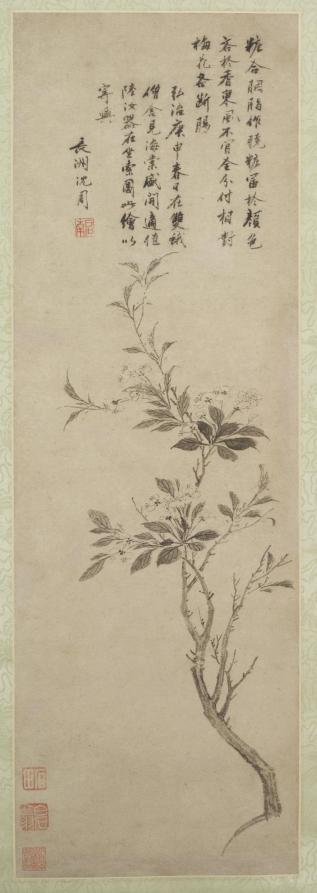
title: Flowering Crab Apple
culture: China, Ming dynasty (1368–1644)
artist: Shen Zhou (Chinese, 1427–1509)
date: 1500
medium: hanging scroll, ink on paper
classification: Painting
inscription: 粧[粉]合胭脂作曉粧，富於顔色吝於香。 東風不肯全分付，相對梅花各斷腸。 弘治庚申春日, 在雙蛾僧舍見海棠盛開, 適值陸汝器在坐索圖, 此繪以寄興。 長洲沈周 [印]啟南; 石田; 白石翁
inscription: 1 additional seal of Wu Yun 吳雲 (1811-1883).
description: Shen Zhou painted a broken branch (zhezhi 折枝) of crab apple, a fragment of nature rather than the full plant in its natural context. Shen uses calligraphic outlines in pure ink to depict the flower petals. The swift yet precise brushstrokes together with the slight S-shaped branch convey vitality. The inscription is a poem written by the artist, commenting on the lovely color and melancholic aura of the crab apple blossom. Shen Zhou is the founder of the Wu School, a group of scholars and officials active around Suzhou in eastern China, known for practicing painting and calligraphy in a refined and elegant style.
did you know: Shen Zhou painted this is an informal and rapidly done presentation picture when he was 74 years old.